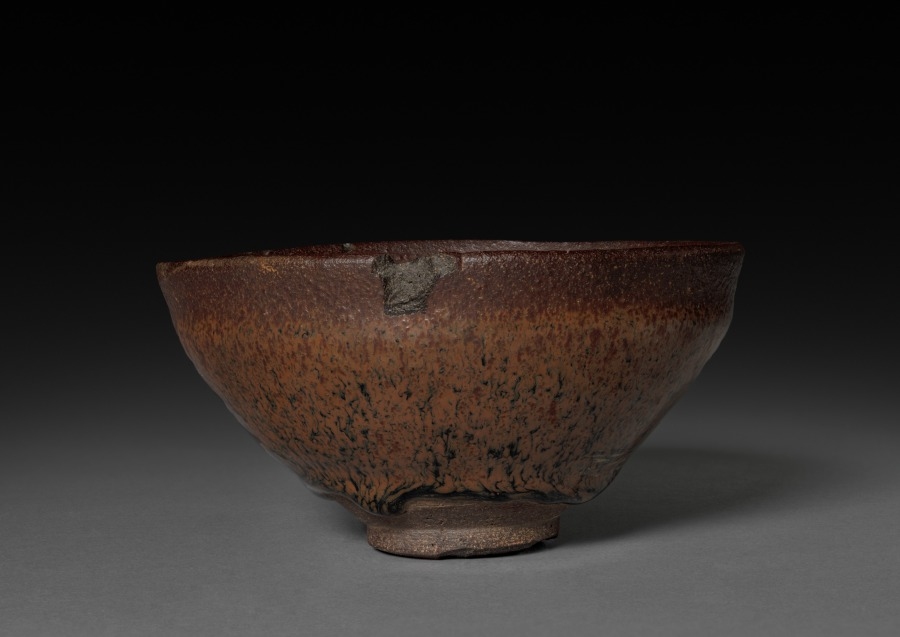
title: Tea Bowl: Jian ware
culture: China, near Shui ch'i, Song dynasty (960-1279)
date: 960–1279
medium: stoneware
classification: Ceramic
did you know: Jian ware was very popular with the tea cultures in China and Japan.